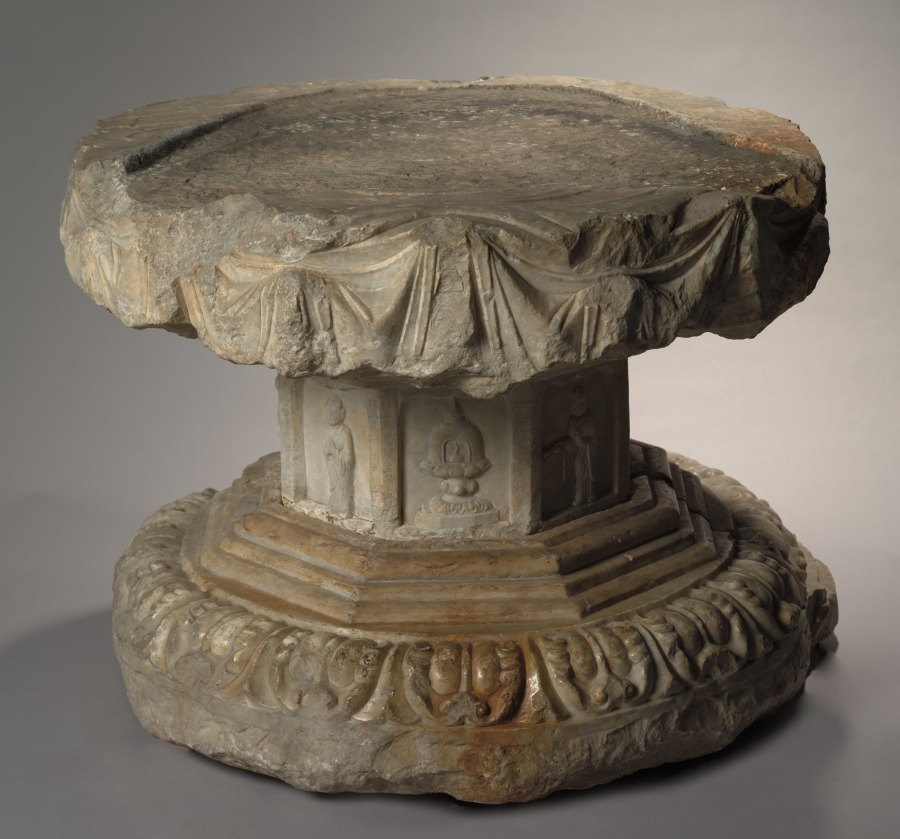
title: Fang Xuanling Pedestal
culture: China, Tang dynasty (618-907)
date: 647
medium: marble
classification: Sculpture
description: This double lotus pedestal exhibits the rich, ornate style of early Tang sculpture. It was commissioned by the Duke of Liang, Fang Xuanling (578–648), for the blessing of his second son and daughter-in-law, the Tang imperial princess of Gaoyang. The iconography and inscription suggest that it originally went with a statue, now missing, of Shakyamuni, the historical Buddha, instead of Amitayus. Today the pedestal is topped with Amitayus, the Buddha of Infinite Life, seated in meditation. Although the pedestal was not made with the statue, the combination is faithful to the original artistic conception.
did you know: In front, the top layer of the pedestal has an abstract curvilinear motif suggesting drapery; the rear is carved with a flower-and-leaf motif.